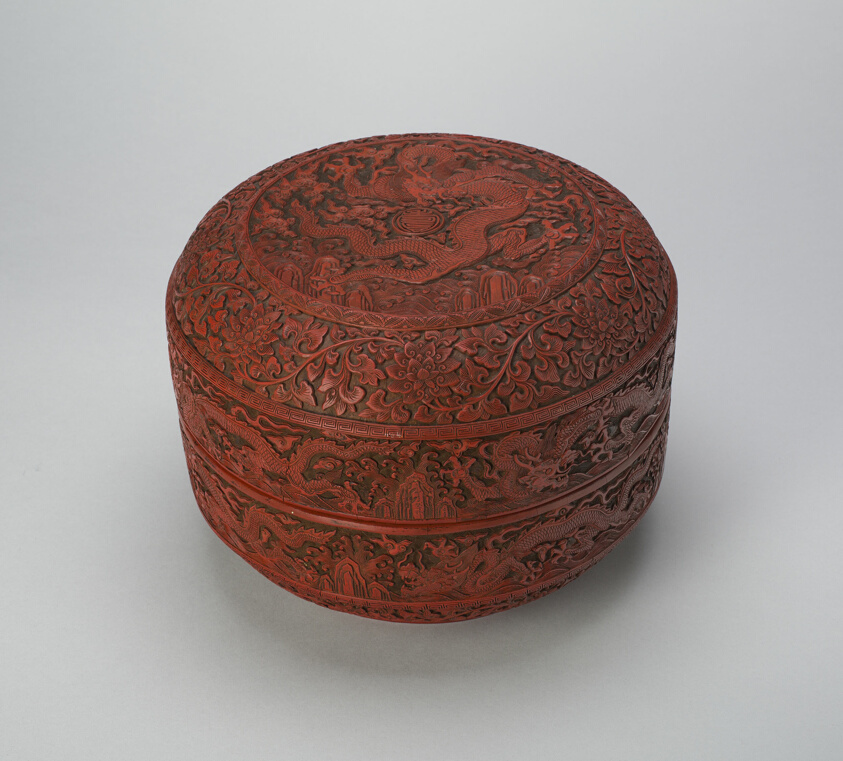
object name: Vessel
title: Covered Box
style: Chinese (culture or style)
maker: China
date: Ming dynasty (1368–1644), Jiajing reign mark and period (1522–1567)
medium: Carved cinnabar lacquer on wood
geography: China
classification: lacquerware; asian art; vessel